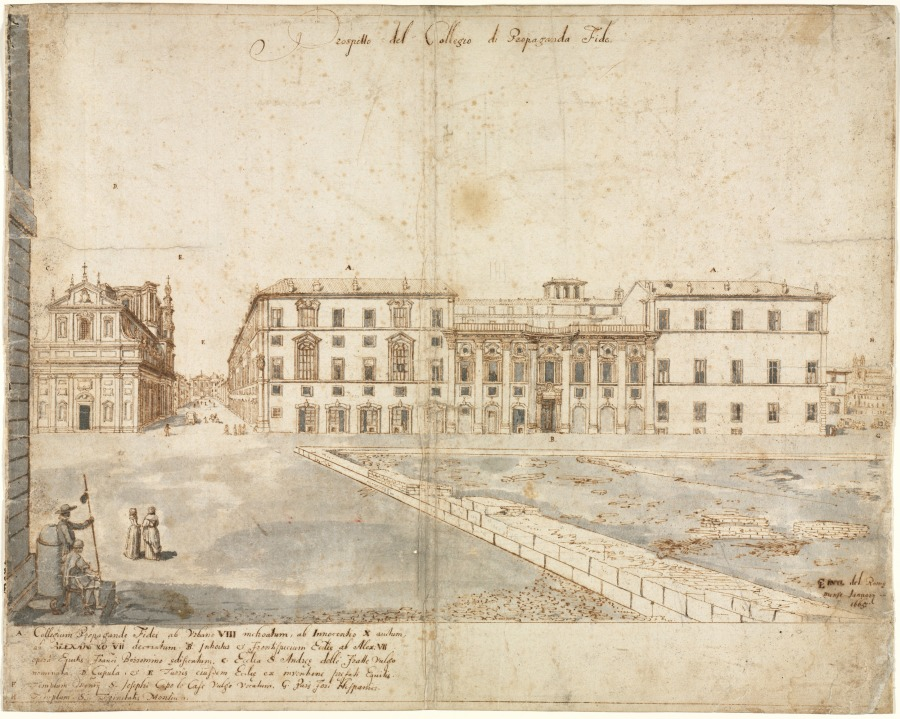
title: Eighteen Views of Rome: The Collegio di Propaganda Fide (recto); Sketches of Windows and Pilasters of the Attic Storey of the Collegio di Propaganda Fide (verso)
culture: Flanders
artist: Lievin Cruyl (Flemish, c. 1640-c. 1720)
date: 1665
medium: pen and brown ink and brush and gray wash over graphite; framing lines in brown ink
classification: Drawing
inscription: recto: signed, lower right, in brown ink: [artist's monogram: LC] RVYL del: Romæ / mense Januarij / 1665. ; by artist, upper center, in brown ink: Prospetto del Collegio di Propaganda Fide. ; by artist, throughout composition, in brown ink: [the letters A-H] ; by artist, lower left, in brown ink: A. Collegium Propagandæ Fidei ab Urbano VIII inchoatum, ab Innocentio X auctum, / ab ALEXAN[D]RO VII decoratum. B. Introitus et Frontispicium Eccliæ ab Alex: VII / operâ Equitis Frañci Borrommo edificatum. C. Ecclia S. Andreæ dellé Fratte vulgo / nominata. D. Cupula , et E Turris eiusdem Eccliæ ex inventione prefati Equitis. / F. Templum Mon~rij S. Josephi Capo le Case vulgo vocatum. G. Pars Fori Hispanici. H. Templum SS. Trinitiatis Montium. verso: upper left, in brown ink: S45[masked] ; upper right, in graphite(?): me[illegible, sideways] ; center, in graphite(?): [illegible] / me[illegible] ; ON PAPER STRIP MOUNTED TO PERIMETER, lower center, in graphite: A20976 ; lower right, in graphite: E. 8